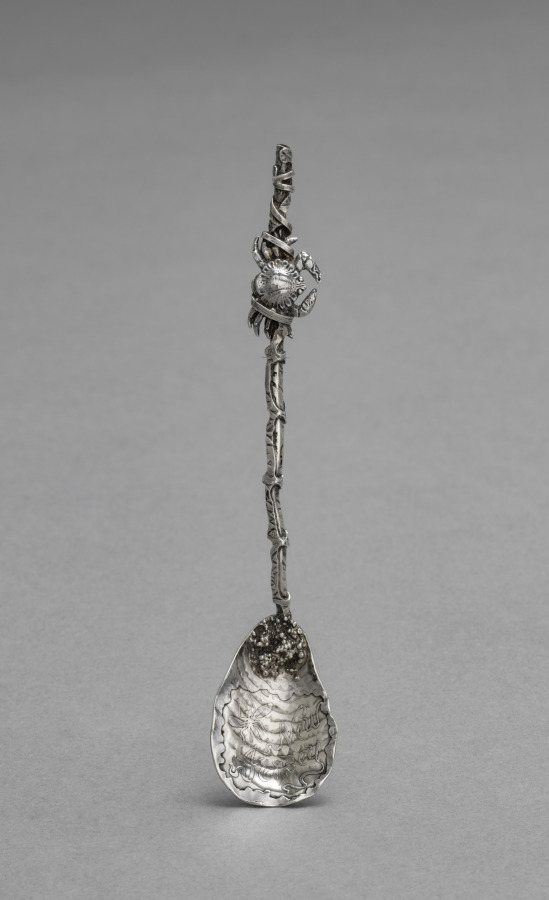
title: Seashell Salt with Shell and Crab Spoon (Spoon)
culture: America, Rhode Island, Providence, 19th century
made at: Gorham Manufacturing Company (America, est. 1831)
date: 1884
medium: handwrought sterling silver, partially gilt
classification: Silver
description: This small salt dish and spoon reflect the late 19th-century interest in incorporating naturalistic details into the design of useful pieces-in this instance probably inspired by Japanese examples.